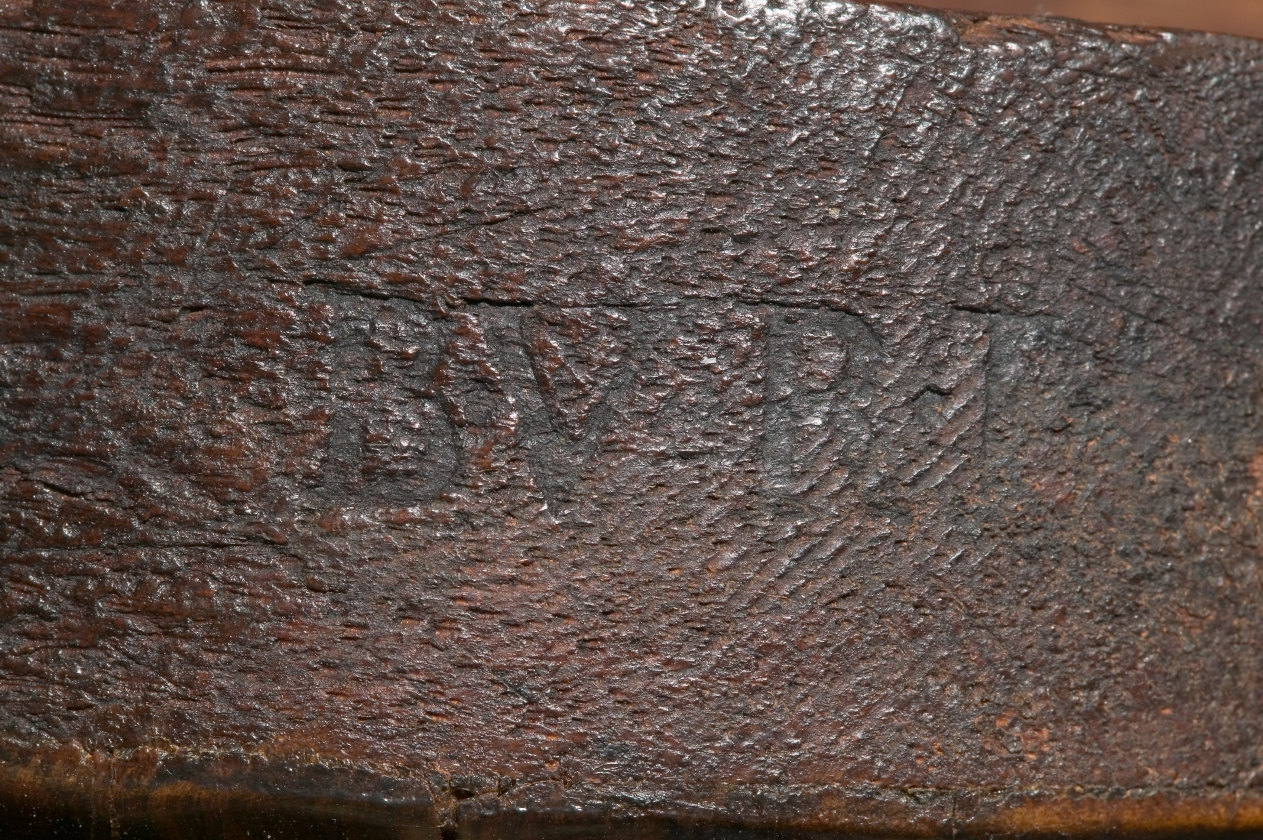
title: Table Desk (Bureau Plat)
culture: France, 18th century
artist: Bernard II van Riesen Burgh (Dutch, 1766)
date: c. 1750– 1760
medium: wood marquetry with gilt bronze mounts, leather top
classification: Furniture and woodwork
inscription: signed three times on bottom edge of apron: B. V. R. B.